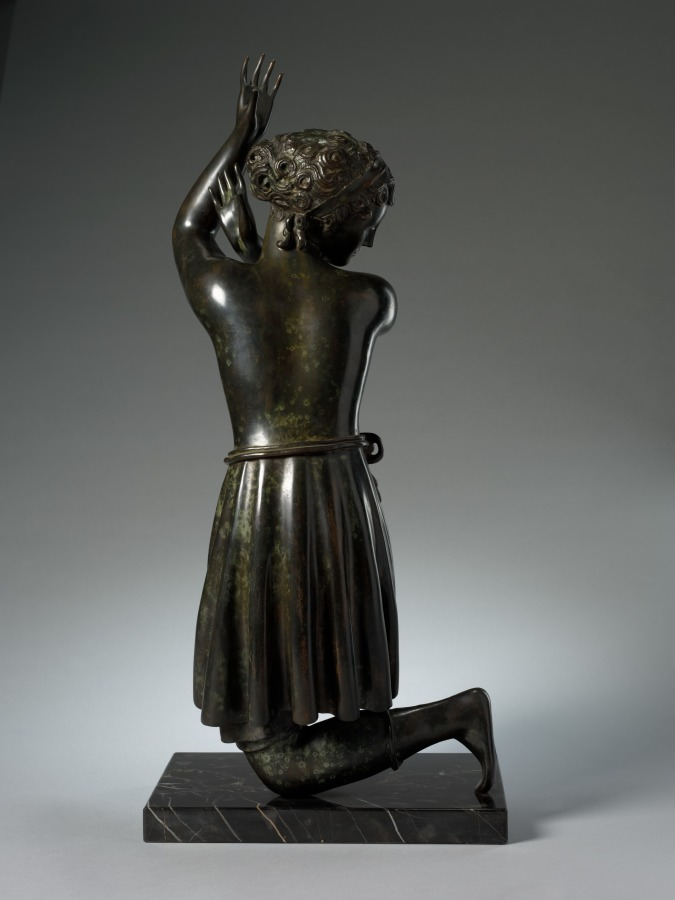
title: Dancing Figure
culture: America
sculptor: Elie Nadelman (American, born Russian Empire [now Poland], 1882–1946)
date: 1916–18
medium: bronze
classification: Sculpture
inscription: Signed: Elie Nadelman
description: Dancing Figure displays the geometrically simplified forms and softened angles that are a hallmark of Elie Nadelman’s work. Its spiraling composition presents a woman whose body partially twists on bended knee. Her raised arms echo the position of her legs.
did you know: A larger version of this sculpture was originally conceived in limestone to decorate an outdoor garden in Long Island.